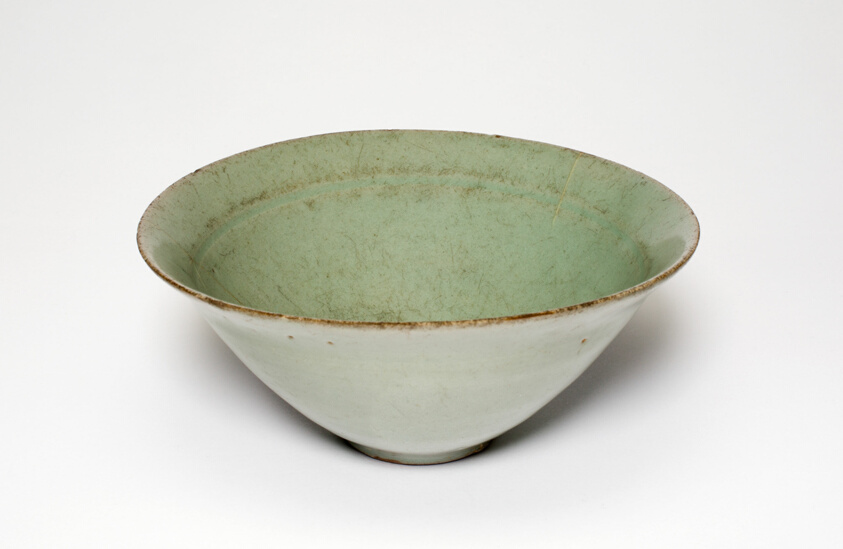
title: Conical Bowl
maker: Korea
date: Goryeo dynasty (918–1392)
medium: Celadon-glazed stoneware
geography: Korea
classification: porcelain; asian art; ceramics